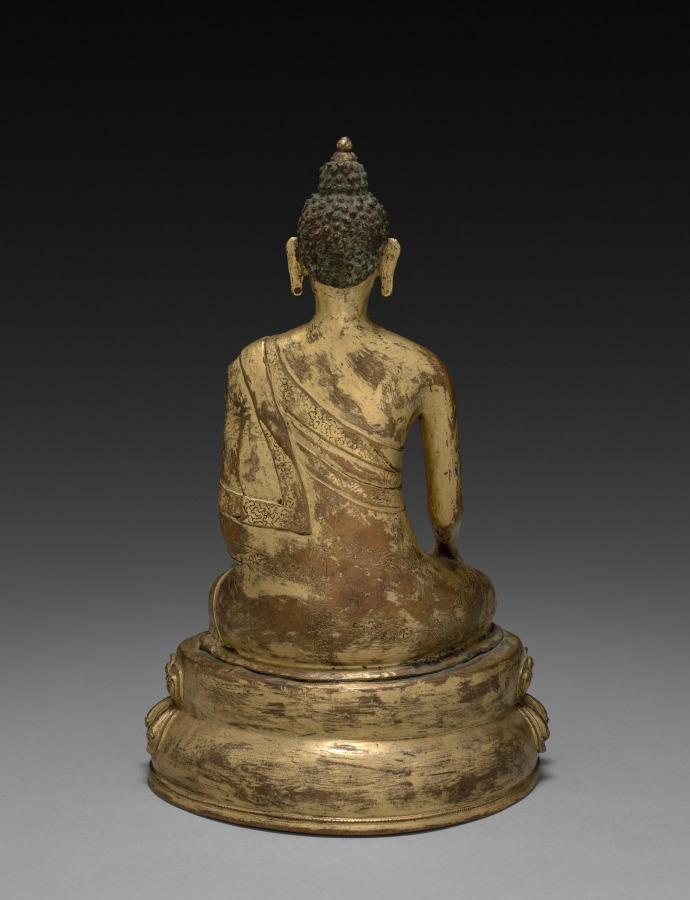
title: Buddhist Triumphant over Temptation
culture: China, Yuan dynasty (1271-1368)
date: c. 1300–1320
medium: gilt bronze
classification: Sculpture